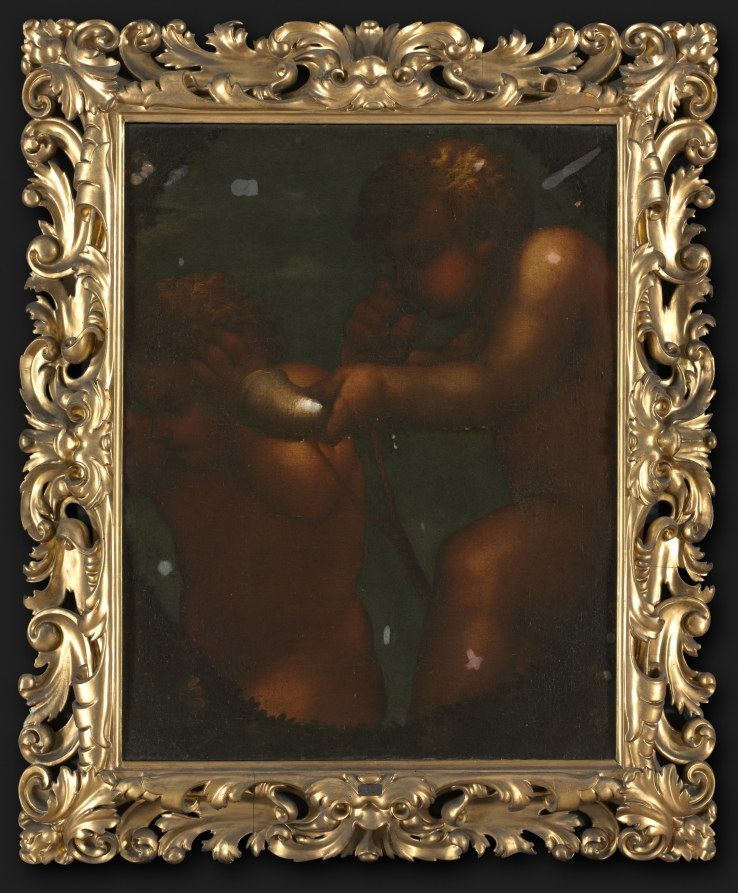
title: Two Putti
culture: Italy, 18th century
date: 1700s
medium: oil on canvas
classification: Painting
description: This painting depicts two playful putti, or cherub figures. One blows his horn into the other's ears; the other covers his ears to protect them. Now obscured by discolored varnish, the painting once had a greenish-blue background, now a mossy green. The pink flesh tones have turned bronze and the gray horn is now a brassy color. In 1519, Correggio painted playful putti in 16 oval ceiling frescoes in the Camera di San Paolo in Parma, Italy. These frescoes were commissioned by the Abbess Gioanna da Piacenza, as the room was her private quarters in the Benedictine nunnery of San Paolo. After the abbess's death, the house was strictly closed to the public for nearly two centuries. Thus Two Putti may be modeled after sketches of the frescoes made during the Abbess's lifetime, or, after the house reopened to the public, the artist may have admired the frescoes directly and modeled these putti after Correggio's originals.